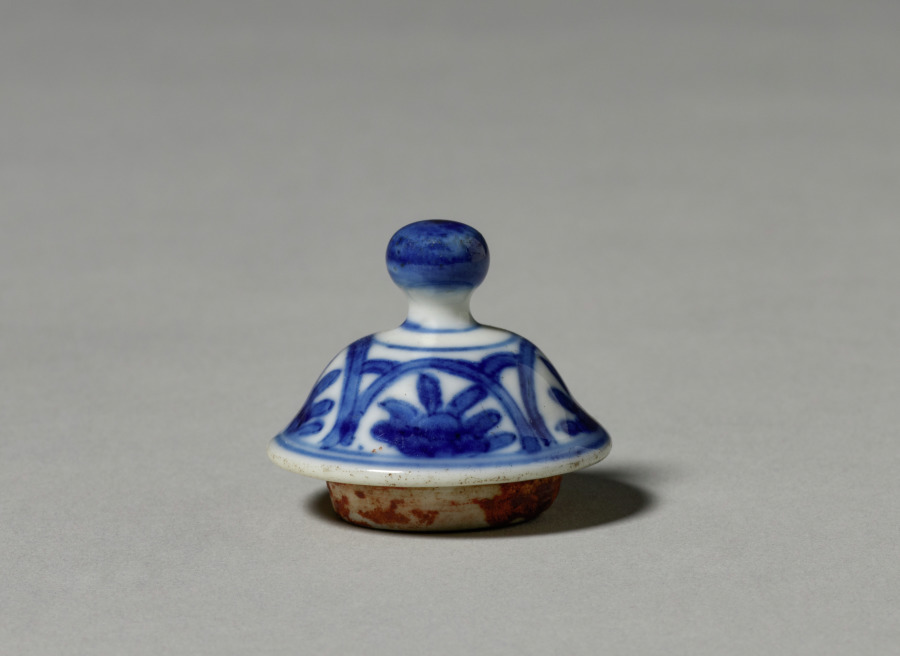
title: Jar with Cover (lid)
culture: China, Qing dynasty (1644-1911)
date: 19th Century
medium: porcelain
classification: Ceramic